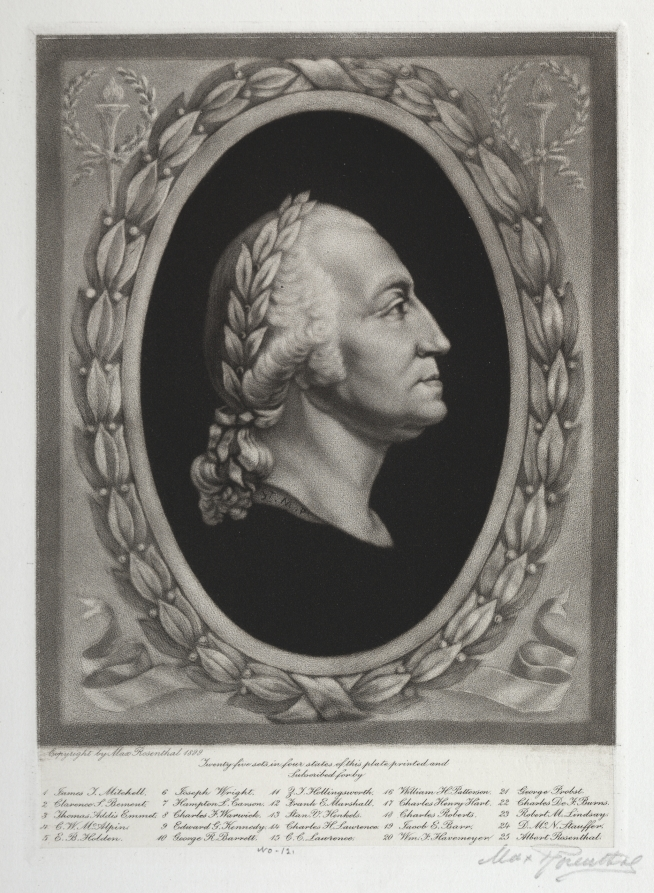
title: George Washington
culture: America, late 19th Century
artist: Max Rosenthal (American, 1833–1918)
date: 1899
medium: mezzotint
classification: Print